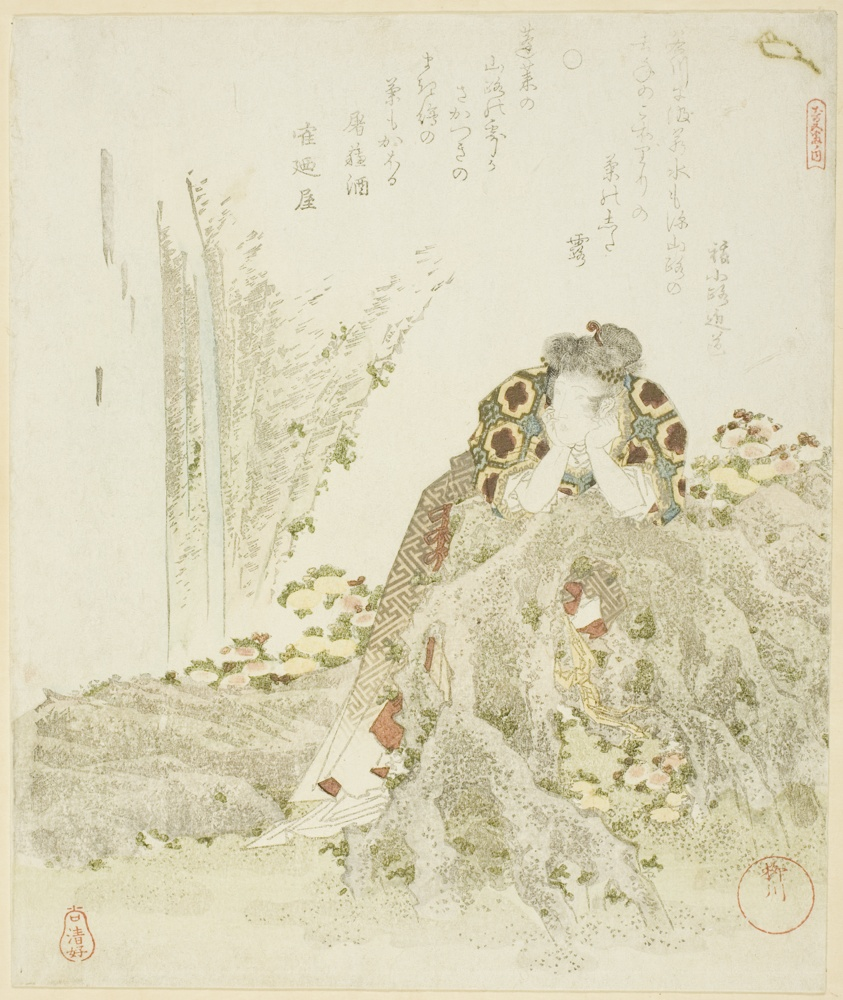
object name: Print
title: Chrysanthemum Boy leaning on a rock, from the series "Five Prints on Longevity (Kotobuki goban no uchi)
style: Japanese (culture or style)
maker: Yanagawa Shigenobu I (Japanese, 1787–1832)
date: mid–1820s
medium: Color woodblock print; shikishiban, surimono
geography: Japan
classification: woodblock print; print; asian art